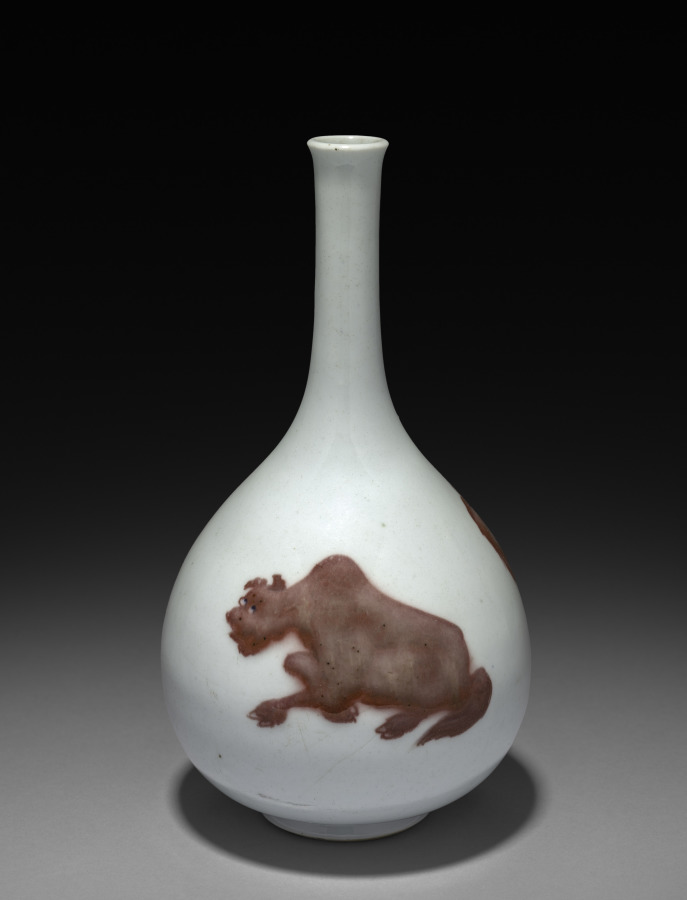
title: Bottle-shaped Vase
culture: China, Qing dynasty (1644-1911), Kangxi reign (1661-1722)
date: 1662–1722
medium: porcelain with underglaze decoration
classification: Ceramic